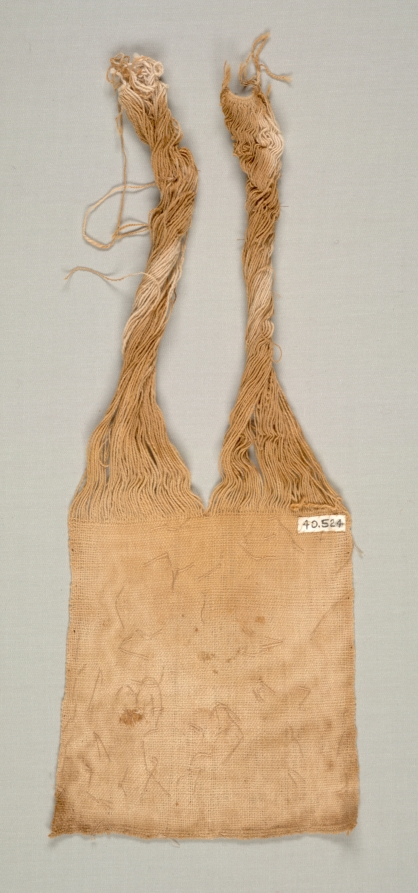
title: Mummy Bundle "Mask"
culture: Peru, South Coast, Ica Valley, Ocucaje site, Paracas style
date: 200–1 BCE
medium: cotton: plain warp-faced cloth, painted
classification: Textile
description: The Paracas people buried their dead in pear-shaped mummy bundles, created by carefully wrapping the seated human body in layers of garments and other textiles. Sometimes a painted cloth was placed on the outer layer at the top of the bundle, as though it served as the bundle’s face, head, or “mask.” Some cloths were painted with masklike faces, although others—such as this example—feature complete figures, which may be mythological beings with supernatural appendages.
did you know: These masks fall into two categories, those with only a face and those with a full-bodied figure.